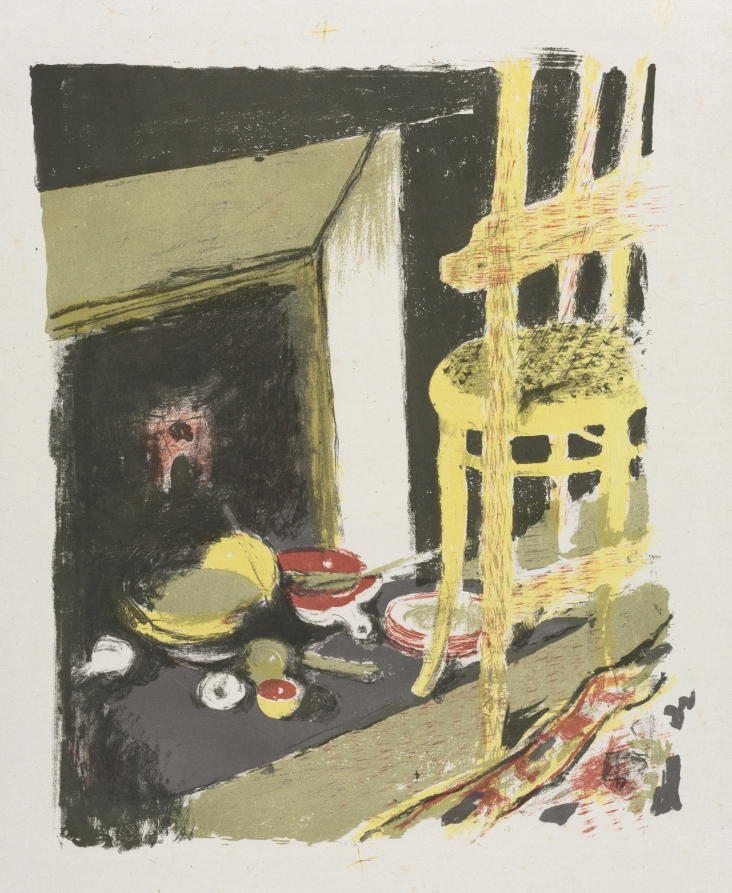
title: The Hearth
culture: France, 19th century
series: Landscapes and Interiors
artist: Édouard Vuillard (French, 1868–1940)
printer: Auguste Clot (French, 1858–1936)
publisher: Ambroise Vollard (French, 1867–1939)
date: 1899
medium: color lithograph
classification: Print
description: Vuillard combines potent signifiers of homelife—the hearth and kitchen tools—that pay homage to the daily chores and comforts of the domestic world he shared with his mother. The strange perspective in which the chair looms above the viewer suggests a childlike viewpoint.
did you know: Among the Nabis, Vuillard assumed the nickname le Nabi Zouave, as the color of his red beard was reminiscent of headdresses worn by the French North African regiment.